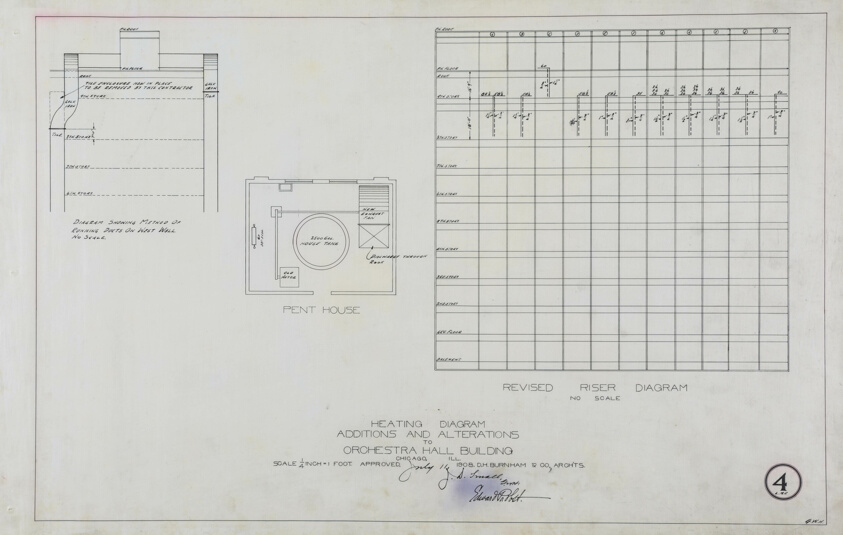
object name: Architectural Drawing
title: Orchestra Hall Heating Revisions, Chicago, Illinois, Diagrams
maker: D.H. Burnham & Company; American, 1896–1912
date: 1908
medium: Ink on linen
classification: architecture; architectural drawing